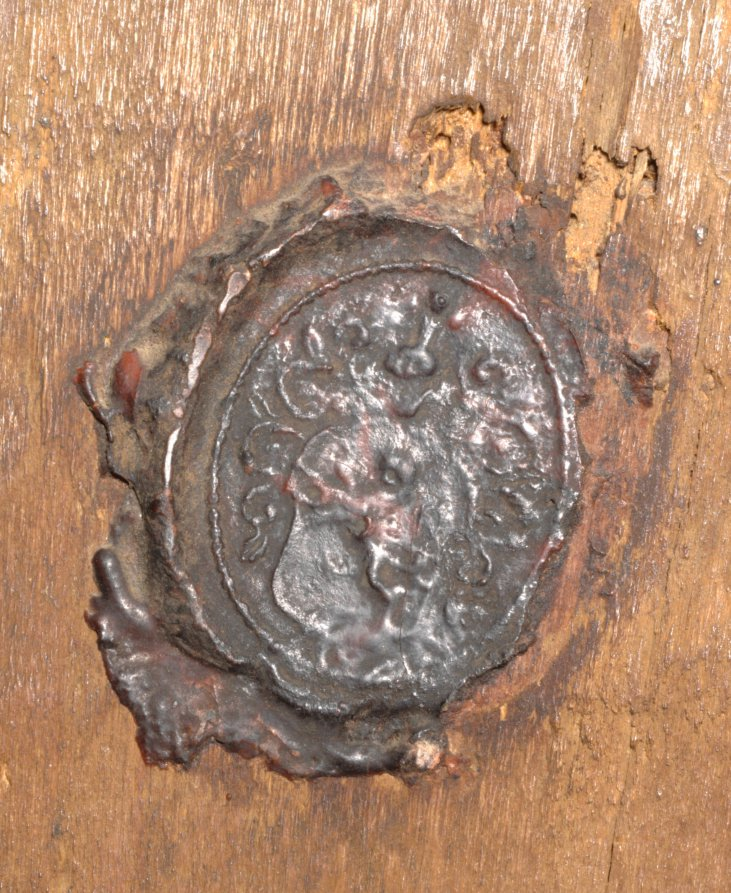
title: Icon of the Mother of God and Infant Christ (Virgin Eleousa)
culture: Republic of Venice, Kingdom of Candia, Candia (Heraklion, Crete, Greece) or Byzantine Empire, Constantinople (Istanbul, Turkey)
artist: attributed to Angelos Akotantos (Cretan, died 1450)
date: c. 1425–50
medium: tempera and gold on wood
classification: Painting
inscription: None visible on obverse; unidentified inscriptions on reverse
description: This large icon of a tender embrace between the Virgin Mary and Christ likely hung on a Greek Orthodox church’s iconostasis, a screen separating the congregation from the altar-containing sanctuary, which only clergy could enter. A skilled painter of faces and draperies, Angelos Akotantos was among Crete’s most sought-after artists. Based in Byzantium’s artistic center in his hometown of Candia, he painted for imperial clients and beyond. Despite theological differences, Cretan icons of Mary were popular in Ethiopia. In the early 1500s, Emperor Lebna Dengel sent monks Zekre and Pawli to acquire Cretan icons for him. Twenty-nine Cretan icons are still venerated (honored) in Ethiopian churches.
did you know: This is the only known work by Angelos Akotantos in the United States.